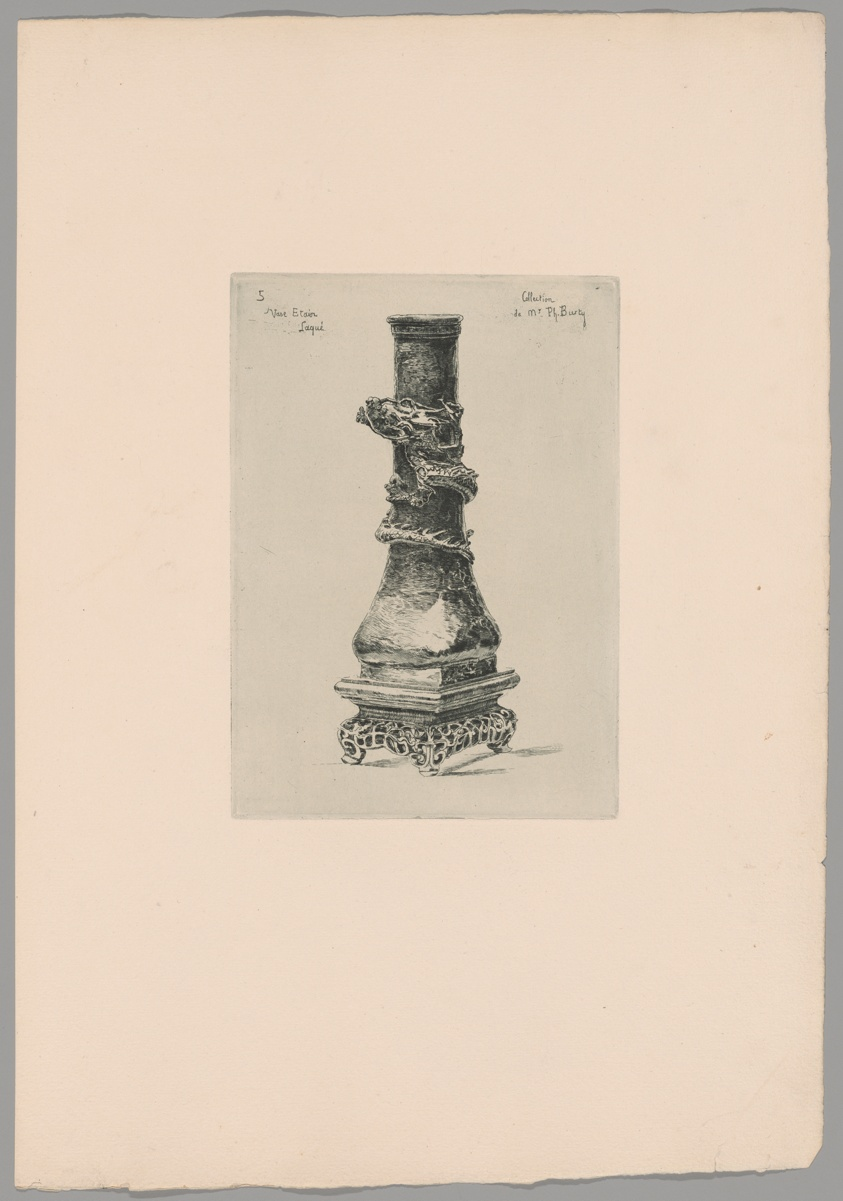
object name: Print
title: Japonisme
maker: Felix Hilaire Buhot; French, 1847-1898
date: 1883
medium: Etching in blackish-blue ink on cream laid paper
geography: France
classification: prints and drawing; etching; paper; print